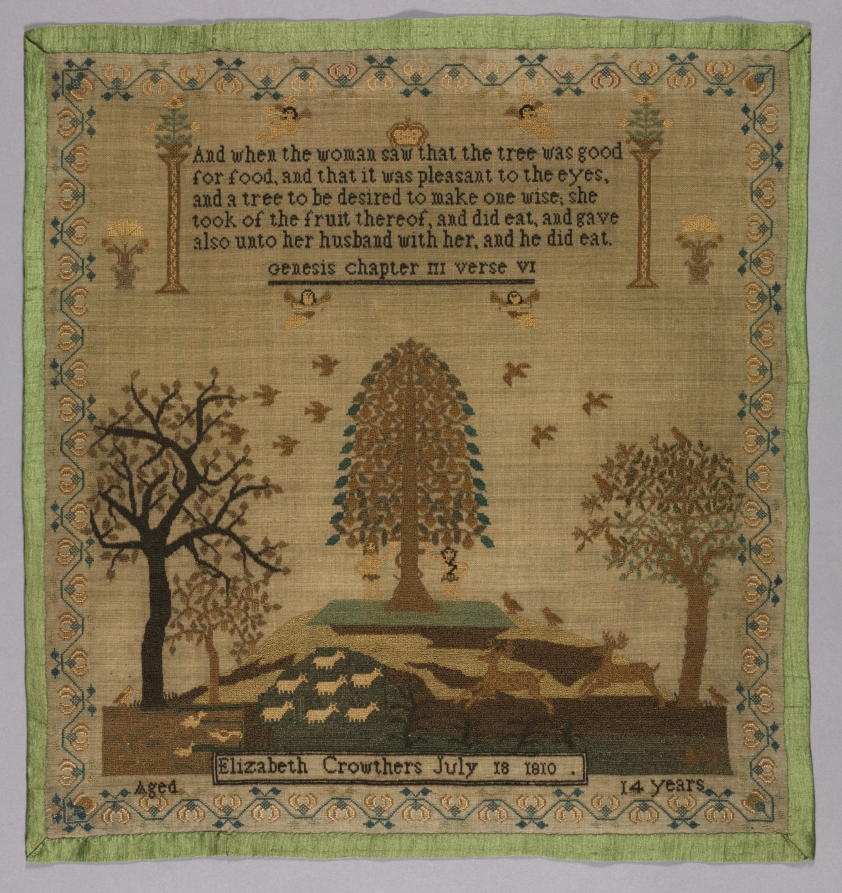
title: Sampler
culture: England, early 19th century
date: 1810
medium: embroidery: silk on linen tabby ground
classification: Sampler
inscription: above: "And when the woman saw that the tree was good/ for food, and that it was pleasant to the eyes,/ and a tree to be desired to make one wise; she/ took of the fruit thereof, and did eat, and gave/ also unto her husband with her, and he did eat./ Genesis chapter III verse VI"; below: "Elizabeth Crowthers July 18 1810."; lower left: "Aged"; lower right: "14 years."